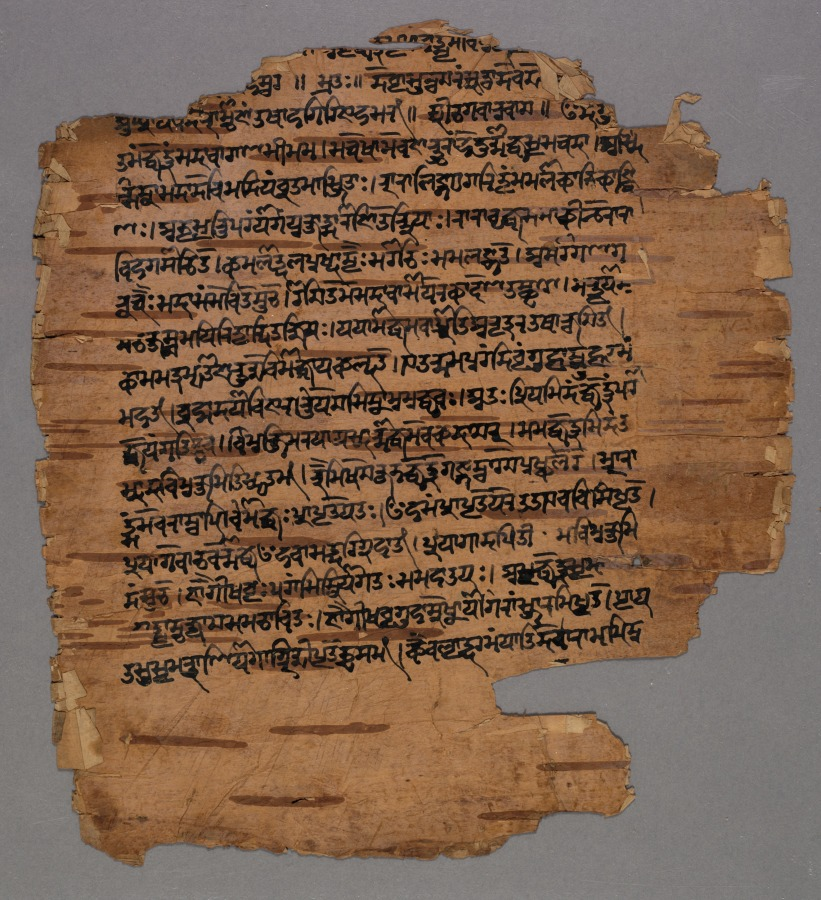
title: Sarada Script (?)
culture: India or Kashmir, probably 17th century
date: 1600s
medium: ink on paper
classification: Manuscript